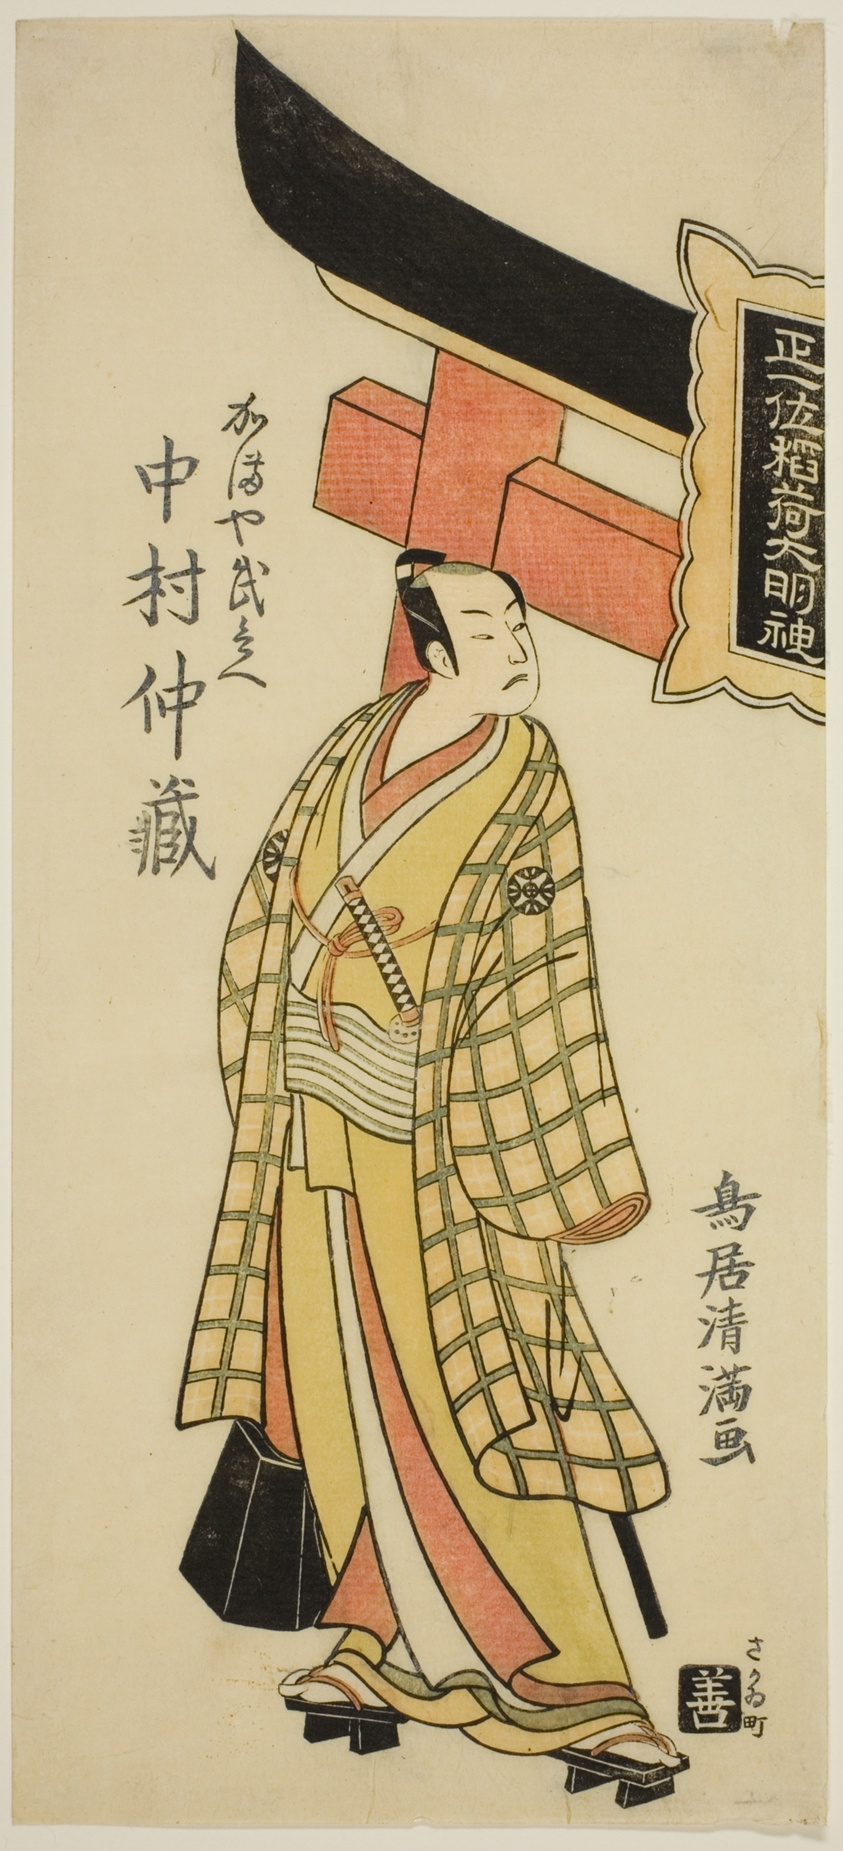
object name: Print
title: The Actor Nakamura Nakazo I as Kamaya Buhei in the play "Fude Hajime Soga no Tamazusa," performed at the Nakamura Theater in the first month, 1768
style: Japanese (culture or style)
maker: Torii Kiyomitsu I (Japanese, 1735–1785)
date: 1768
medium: Color woodblock print; hosoban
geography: Japan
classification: woodblock print; print; asian art